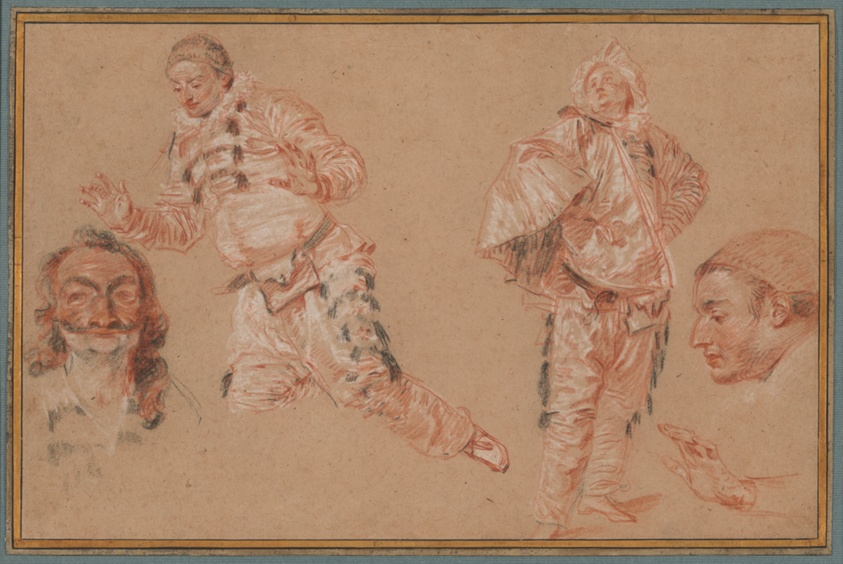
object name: Drawing and Watercolor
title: Italian Comedians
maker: Jean Antoine Watteau (French, 1684-1721)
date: 1719/20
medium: Red, black, and white chalks, with stumping, on cream laid paper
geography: France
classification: chalk; drawings (visual works); prints and drawing